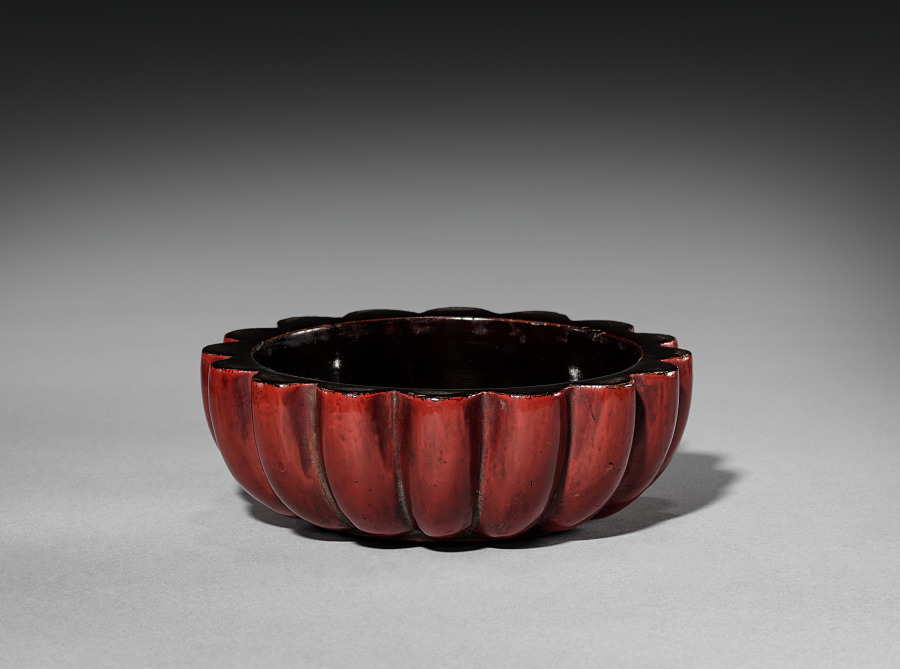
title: Tea Caddy (Chaire) (lid)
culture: Japan, Muromachi period (1392–1573)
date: 1500s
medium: Negoro lacquer on wood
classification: Lacquer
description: Negoro is a lacquer technique, named after the Negoro temple in Japan, in which several layers of red lacquer are applied over a black lacquer undercoating. Through years of handling, a natural surface of red and black random patterns emerges, an aesthetic highly prized by the Japanese.